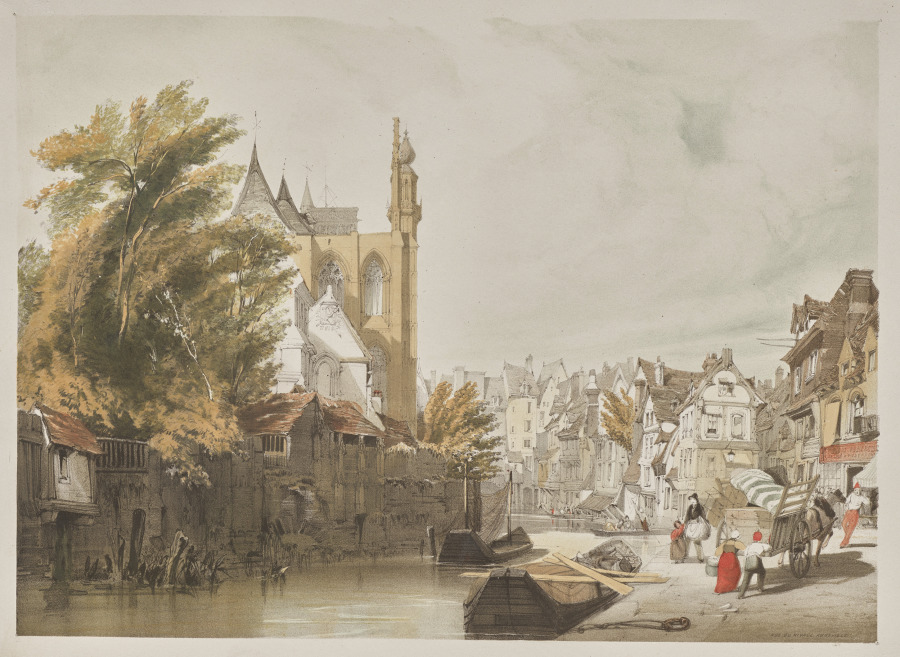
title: Picturesque Architecture in Paris, Ghent, Antwerp, Rouen: Rue du Rivage, Abbeville, France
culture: England, 19th century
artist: Thomas Shotter Boys (British, 1803–1874)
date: 1839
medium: lithograph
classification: Portfolio